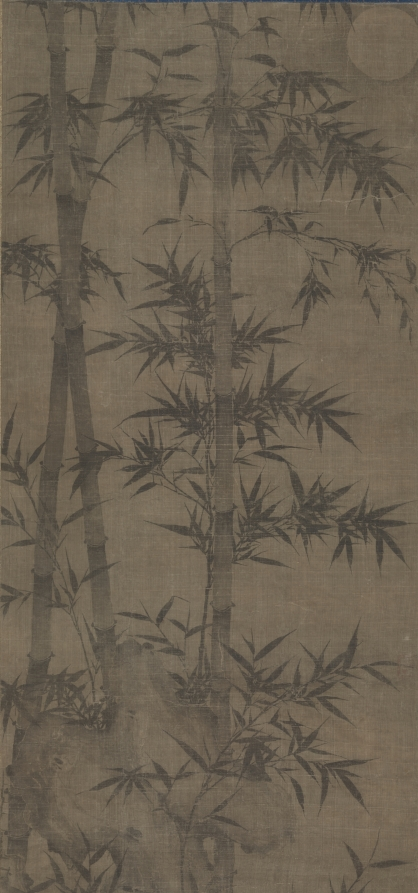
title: Bamboo in Four Seasons: Spring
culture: China, Yuan dynasty (1271-1368)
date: 1279–1368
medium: hanging scroll, ink on silk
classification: Painting